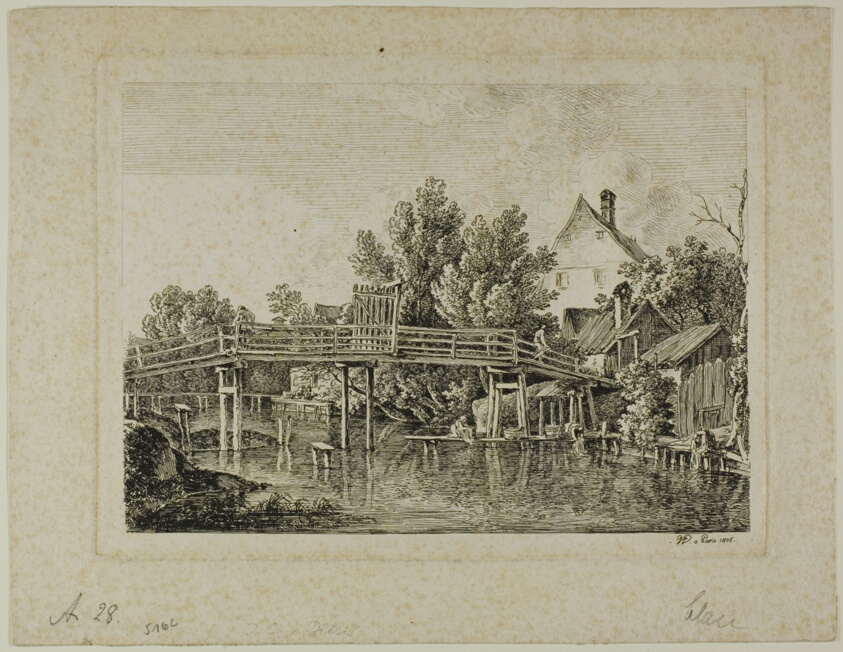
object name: Print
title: The Little Bridge Across the Isar, Paris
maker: Johann Georg von Dillis (German, 1759-1841)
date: 1806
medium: Etching on laid paper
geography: Germany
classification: etching; print; prints and drawing